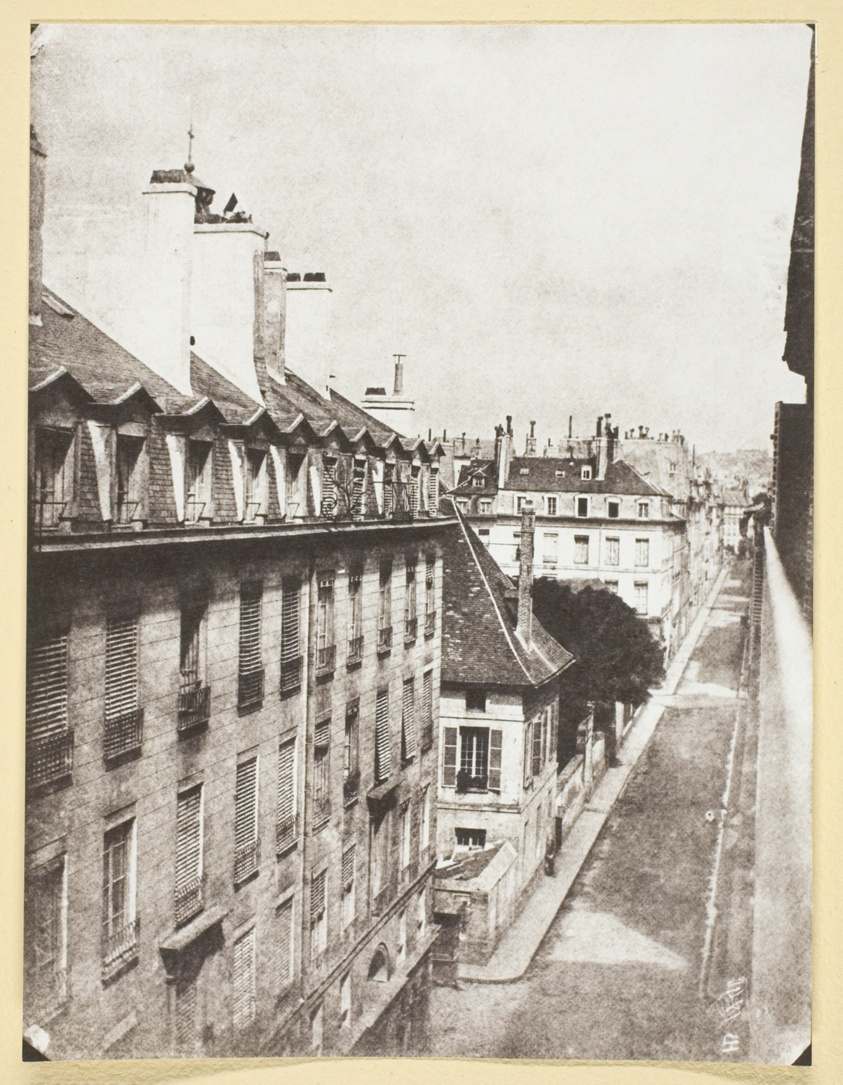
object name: Photograph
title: Rue Cambon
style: 19th century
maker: Hippolyte Bayard (French, 1801–1887)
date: 1846, printed 1965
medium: Gelatin silver print, No. 16 from the portfolio "Bayard: XXV Calotypes, 1842-1850" (1965)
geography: France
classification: photographic process; photography; photograph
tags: Collected by Hugh Edwards